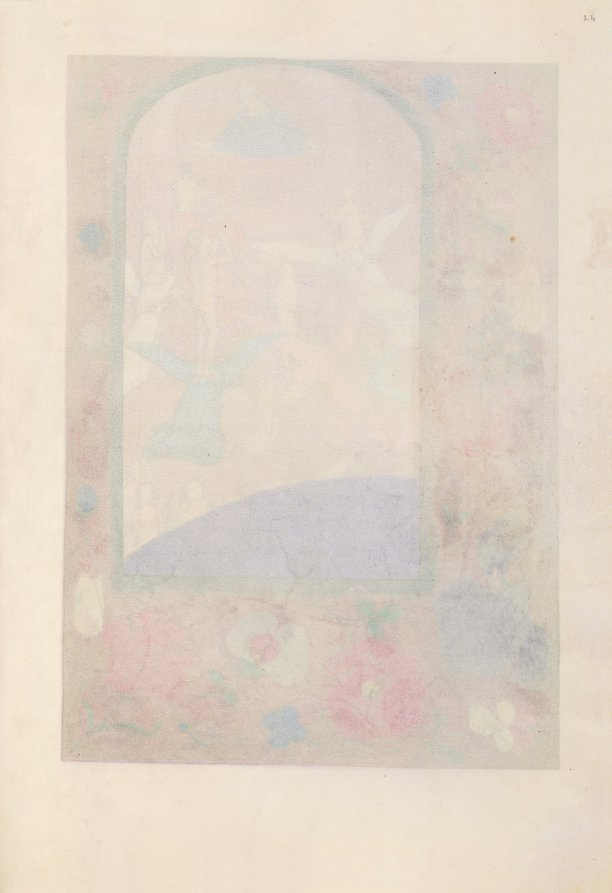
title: Hours of Queen Isabella the Catholic, Queen of Spain: Fol. 24r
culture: Flanders, Ghent and Bruges, late 15th century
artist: Master of the First Prayerbook of Maximillian (Flemish, c. 1444–1519)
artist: and Associates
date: c. 1500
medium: ink, tempera, and gold on vellum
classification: Bound Volume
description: This manuscript was illuminated by a circle of at least five highly organized manuscript painters active in the Flemish cities of Ghent and Bruges. The principal illuminator was Alexander Bening, who painted the majority of the book's miniatures. Manuscripts produced by this circle of artists are renowned for the decoration of their borders, which typically feature a rich variety of realistically-painted flowers, birds, and butterflies. This prayer book, called a book of hours, was intended not for a cleric, but for the private devotions of a lay person-in this case, Isabella the Catholic, Queen of Spain (1451-1504). Isabella's coat of arms embellishes the book's frontispiece. It is unlikely that the book was commissioned by the Queen herself; rather, she probably received it as a diplomatic gift from someone courting her patronage, perhaps Cardinal Francisco Jimenez de Cisneros. A Franciscan friar, Jimenez was dependent upon Isabella for his advancement, first to the post of Queen's confessor in 1492, and then to Archbishop of Toledo in 1495.